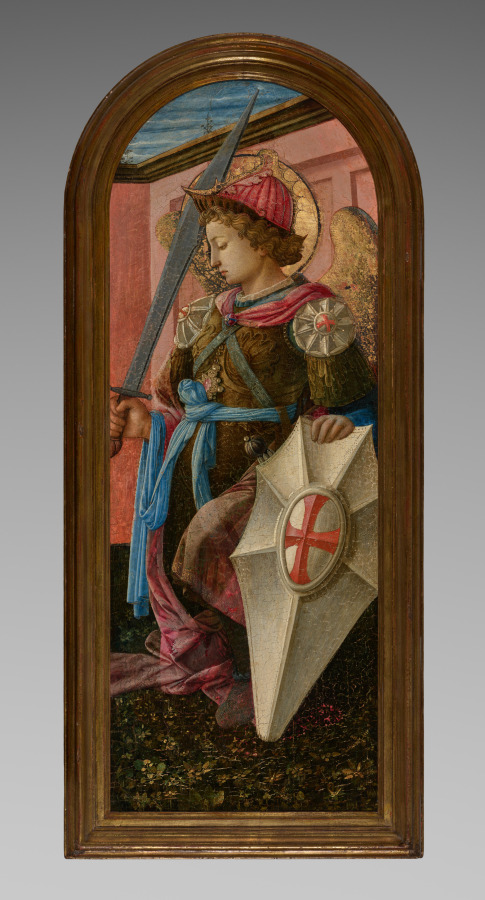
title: Panel from a Triptych: The Archangel Michael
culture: Italy, Florence, 15th century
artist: Fra Filippo Lippi (Italian, c. 1406–1469)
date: 1458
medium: tempera on wood panel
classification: Painting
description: These panels depicting Saints Anthony the Abbot and Michael originally flanked a central scene of the Madonna and Child with Angels, now lost, to form a triptych. Giovanni di Cosimo de’Medici of Florence commissioned the ensemble in 1457 as a gift to Alfonso V of Aragon. Fra Filippo Lippi, a Carmelite friar and one of the great masters of early Renaissance Florence, depicted realistic, weighty figures in a three-dimensional space using a system of linear perspective, inspired partly by Masaccio’s Brancacci Chapel, and reflected in the background architecture. Saint Anthony the Abbot rejected all earthly possessions in pursuit of a contemplative life in the desert. He is generally regarded as the founder of monasticism and is depicted wearing a monk’s habit. Saint Michael’s sword and shield refer to his role as heaven’s defender against evil.